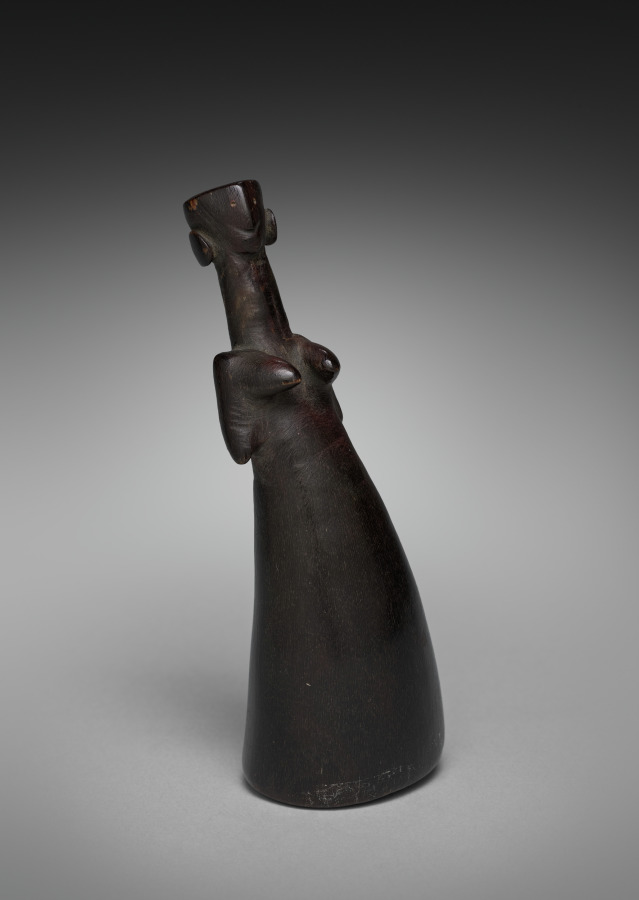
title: Snuff Container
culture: Africa, Southern Africa, Lesotho, South Sotho maker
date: 1800s-1900s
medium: Horn and wood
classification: Vessels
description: This snuff container in the form of a human (female) figure was carved from cattle horn. The form of the image follows the curve of the horn, with arms and hands held to the chest. Despite its smallish size and minimalist execution, this object demonstrates considerable expressive power. Cattle had special meaning for the pastoralist peoples of southern Africa in that it stood for the wealth and status of the individual and the group. However, similar to the ideas associated with tobacco and snuff, cattle also referred to the world of the ancestors. Snuff containers like this one had great significance for their owners and users.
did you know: The tobacco product snuff was stored in decorative, yet useful, containers like this one.